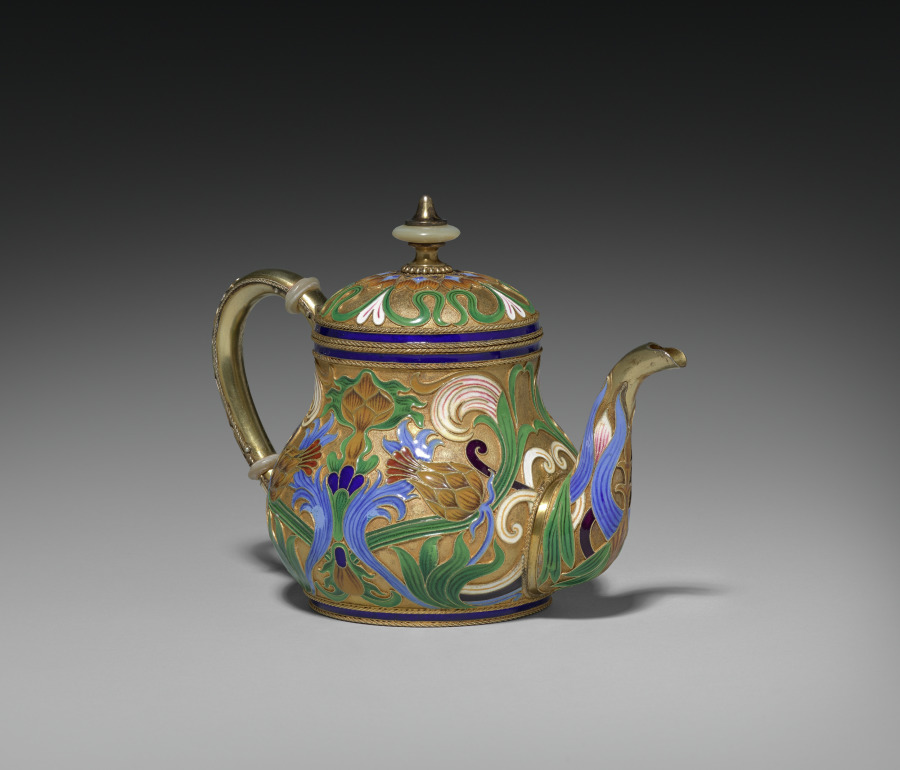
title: Covered Teapot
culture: Russia, St. Petersburg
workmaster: attributed to Feodor Ivanovich Rückert (Russian, 1840–1917)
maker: House of Fabergé (Russian, 1842–1918)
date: 1887–96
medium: silver gilt, opaque cloisonné enamel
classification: Miscellaneous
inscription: 84, St. George [assay mark for Moscow, 1882-1896]; C. Fabergé (in Cyrillic); double-headed eagle [imperial warrant]; St. George; initials of Carl Fabergé (in Cyrillic).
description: Fabergé’s craftsmen in Moscow, especially under the watchful eye of workmaster Feodor Rückert, became known for their work in the pan-Slavic or neo-Russian style, hearkening back to 17th-century motifs of Russian folk art. Often on rather conventional shapes, Rückert and his silversmiths created an explosion of color, achieved through the historic technique of cloisonné enamel in which tiny metal lines are soldered to the surface then filled with glass powders in various colors and fired to create a high gloss finish. The result is a spectacular evocation of the 17th-century originals. Far from mere copies, however, Rückert's designs, such as this tea service, employ naturalistic or abstract motifs in a thoroughly modern adaptation of a remarkable earlier period of Russian art and decoration.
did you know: This covered teapot is part of a larger tea service.